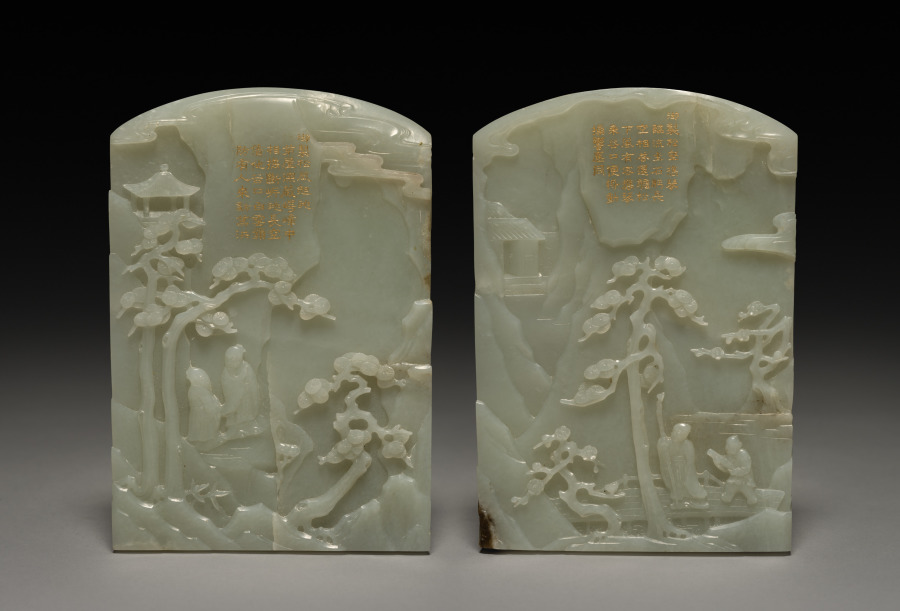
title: Table Screen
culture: China, Qing dynasty (1644–1911), Qianlong reign (1736–95)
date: 1736–95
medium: jade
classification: Jade